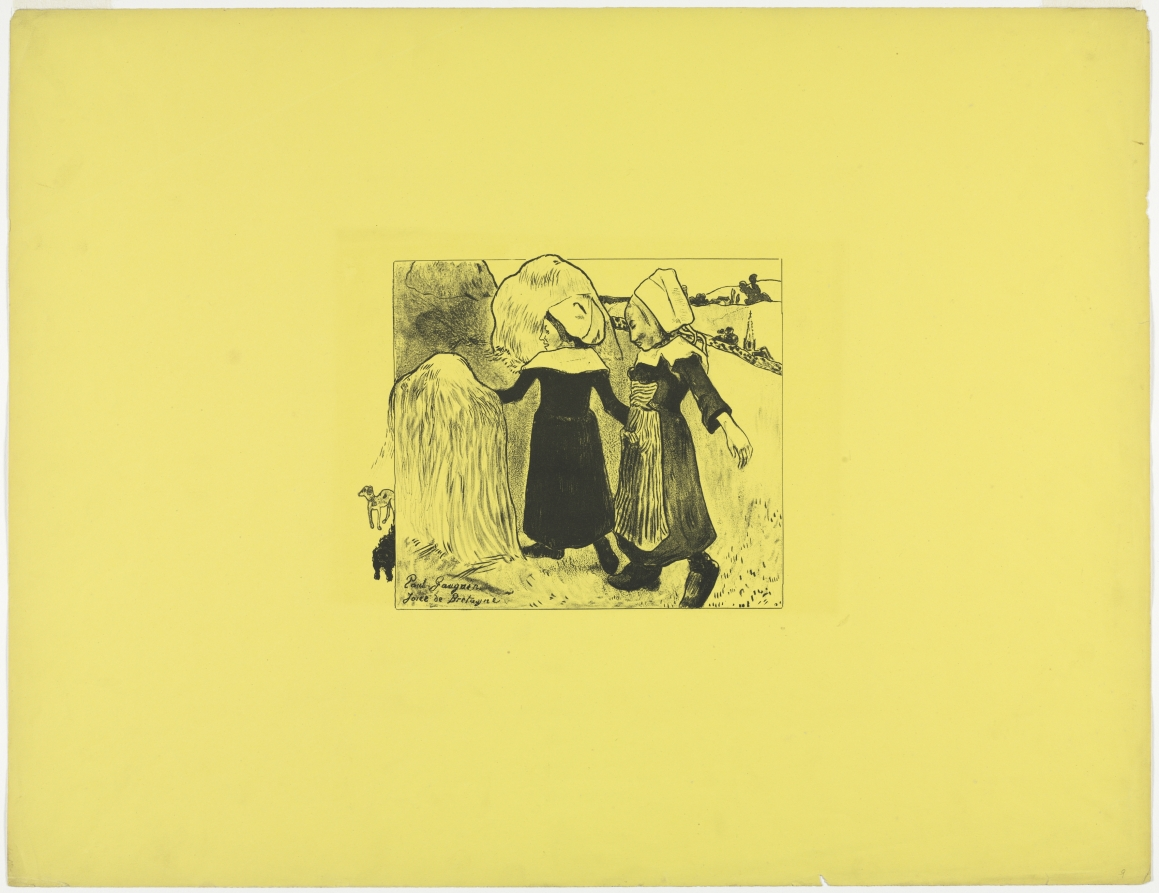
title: Volpini Suite: Joys of Brittany (Joies de Bretagne)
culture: France, 19th century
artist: Paul Gauguin (French, 1848–1903)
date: 1889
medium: zincograph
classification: Print